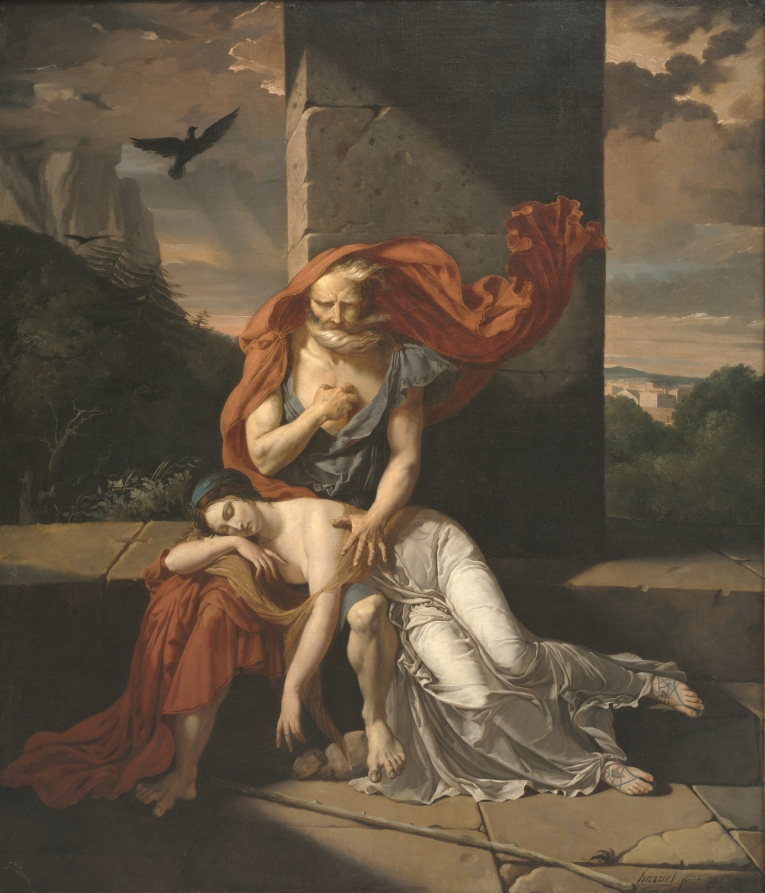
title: Oedipus at Colonus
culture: France, 18th century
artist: Fulchran Jean Harriet (French, 1778–1805)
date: 1798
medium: oil on canvas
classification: Painting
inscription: on reverse of stretcher: white sticker "57/78", chene label; on obverse: lower right "harriet fcit an6"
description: The ancient mythical Greek king Oedipus fulfilled his fate by unknowingly killing his father and marrying his mother. He subsequently blinded himself and was exiled. Here, Oedipus reprimands himself, while protecting his daughter Antigone. Oedipus became popular in France just after the French Revolution, since the subject addressed the return of exiles. The ancient Greek writer Sophocles provided the best-known version of the tragedy, but an interpretation that played in Paris in 1797 inspired Harriet’s work.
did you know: Fulchran Jean Harriet died young at age 29, and less than 10 of his works survive today.